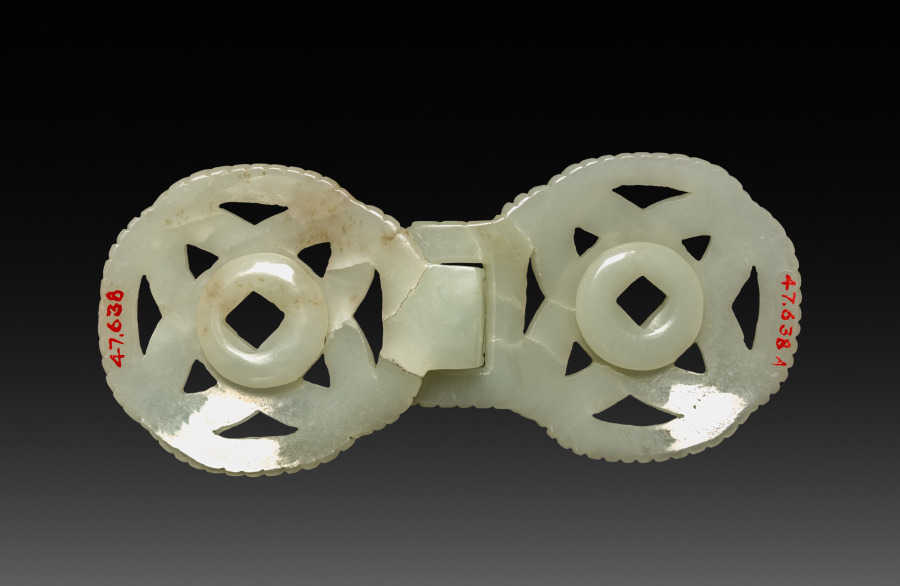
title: Buckle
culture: China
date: 1900s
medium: jade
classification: Jewelry